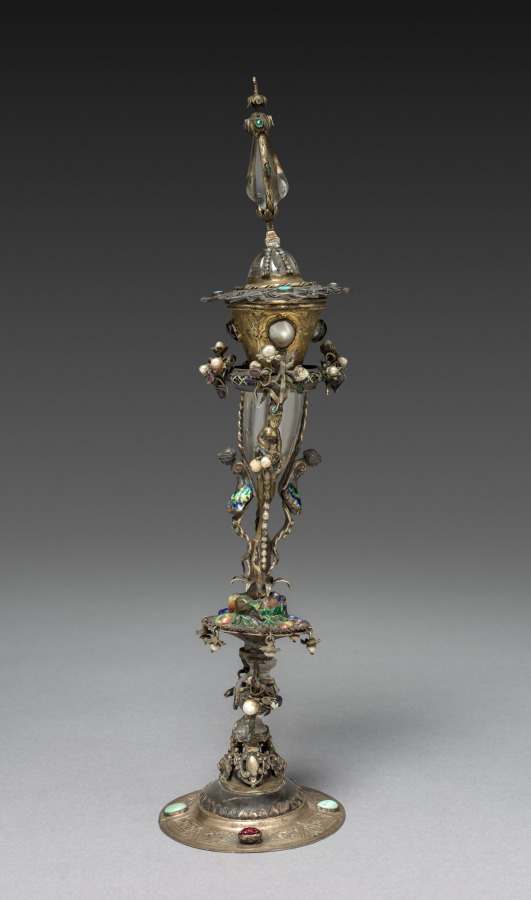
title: Blood Reliquary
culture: Italy (?), 16th century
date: 1500s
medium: gilt silver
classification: Metalwork